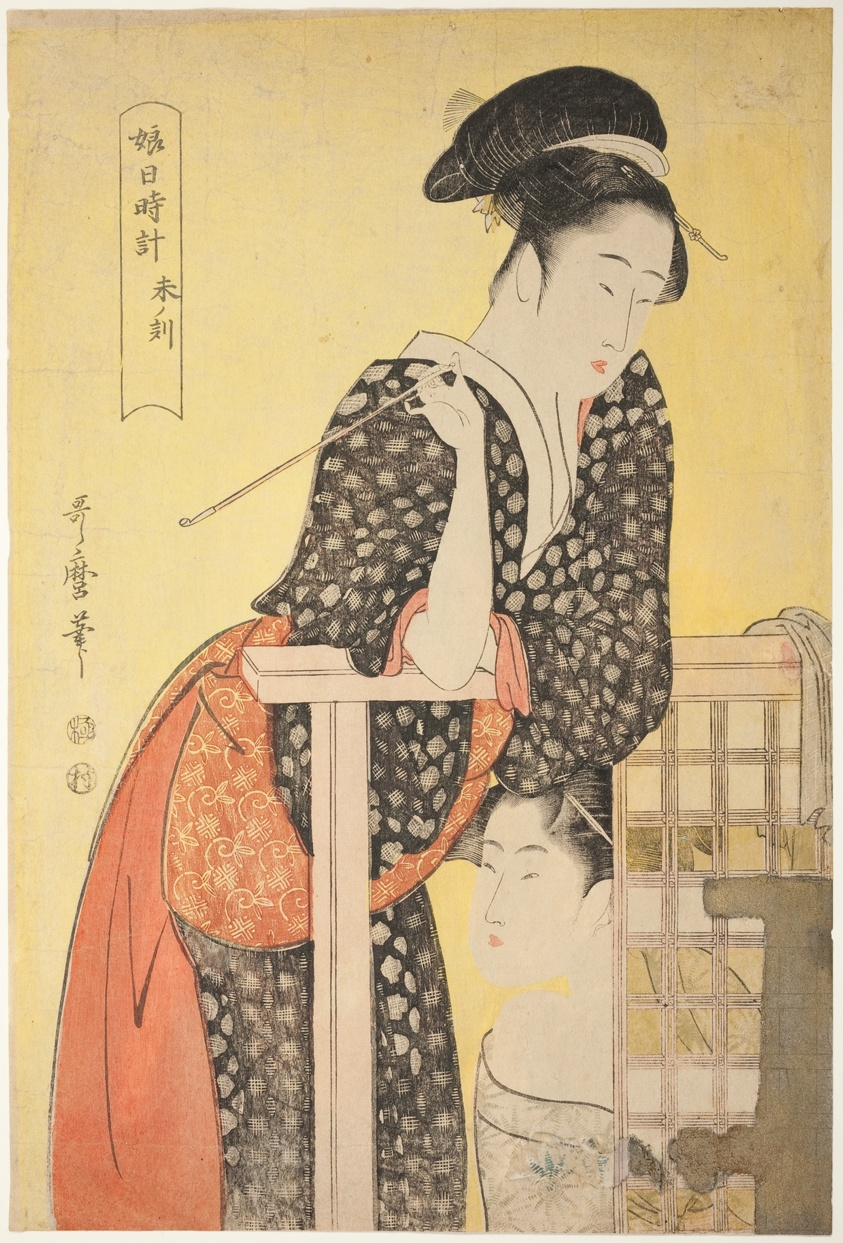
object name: Print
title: Hour of the Sheep [2 pm] (hitsuji no koku), from the series “Sundial of Young Women" ("Musume hi-dokei")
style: Japanese (culture or style)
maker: Kitagawa Utamaro 喜多川 歌麿; Japanese, 1753 (?)-1806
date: c. 1794/95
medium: Color woodblock print; oban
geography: Japan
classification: woodblock print; print; asian art